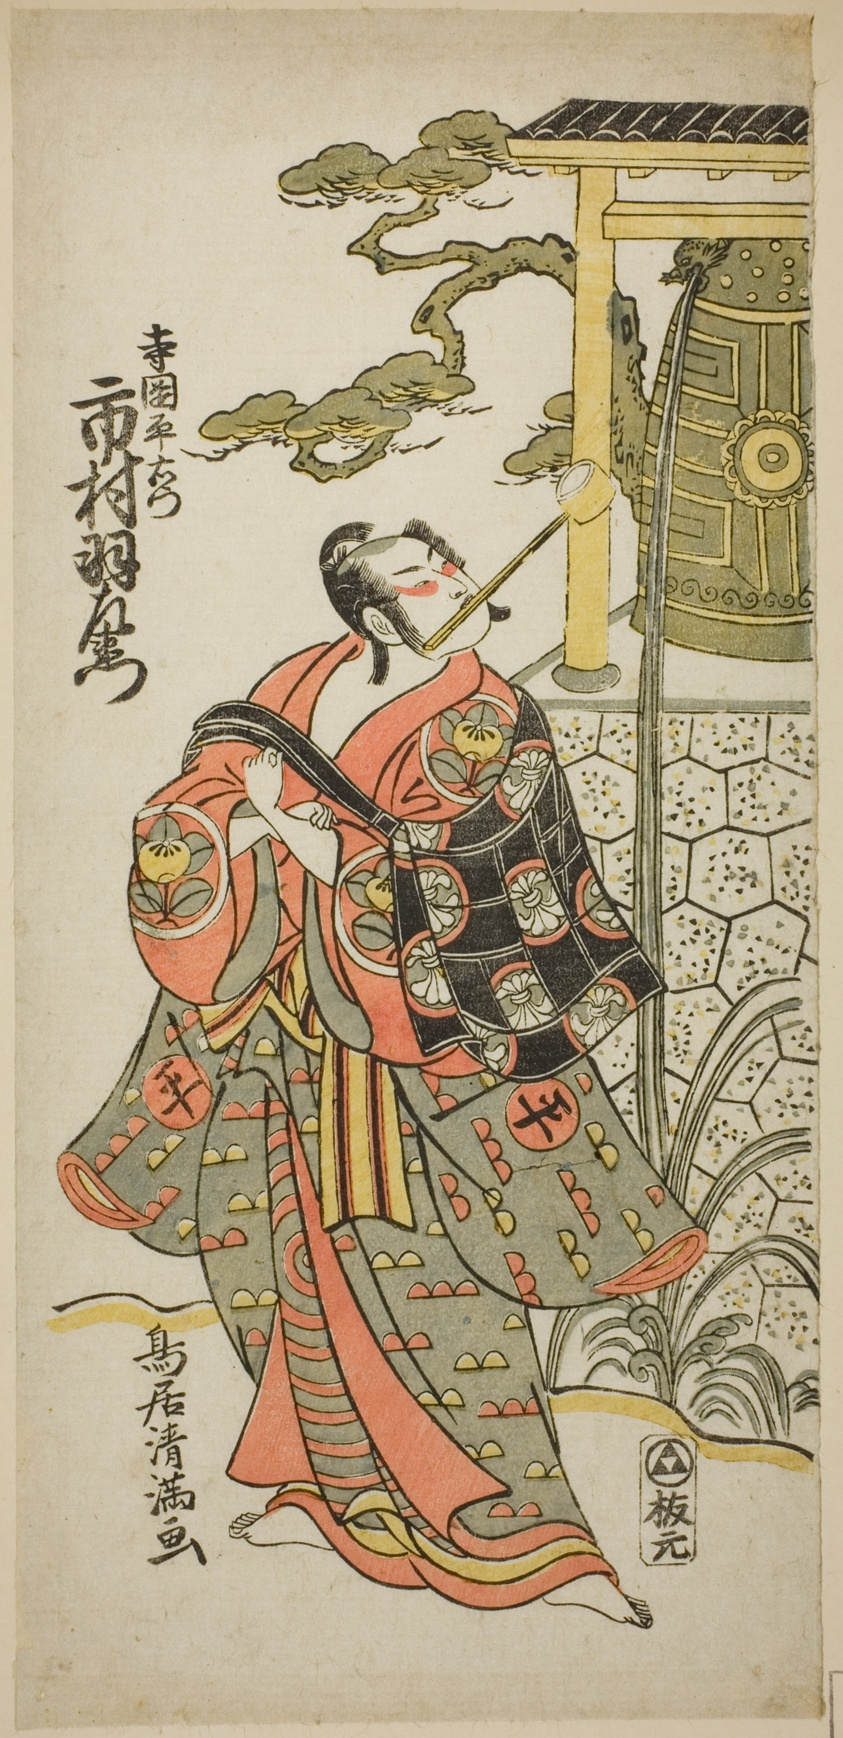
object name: Print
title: The Actor Ichimura Uzaemon IX as Teraoka Heiemon in the play "Hoshi Aikotoba Higashiyama no Sakae," performed at the Ichimura Theater in the ninth month, 1763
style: Japanese (culture or style)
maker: Torii Kiyomitsu I (Japanese, 1735–1785)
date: 1763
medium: Color woodblock print; hosoban, benizuri-e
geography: Japan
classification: woodblock print; print; asian art